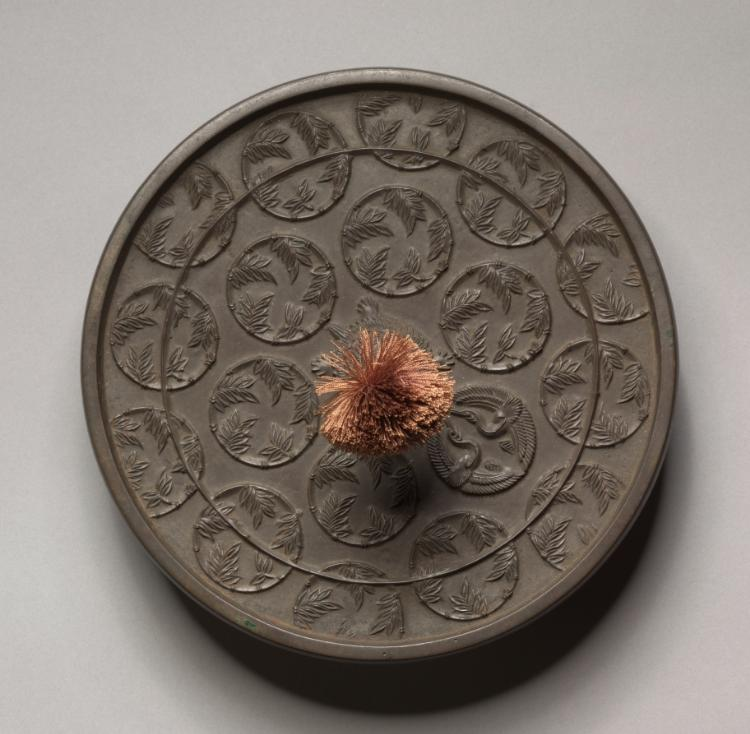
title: Mirror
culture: Japan, Heian period (794–1185)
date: 794–1185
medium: bronze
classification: Metalwork